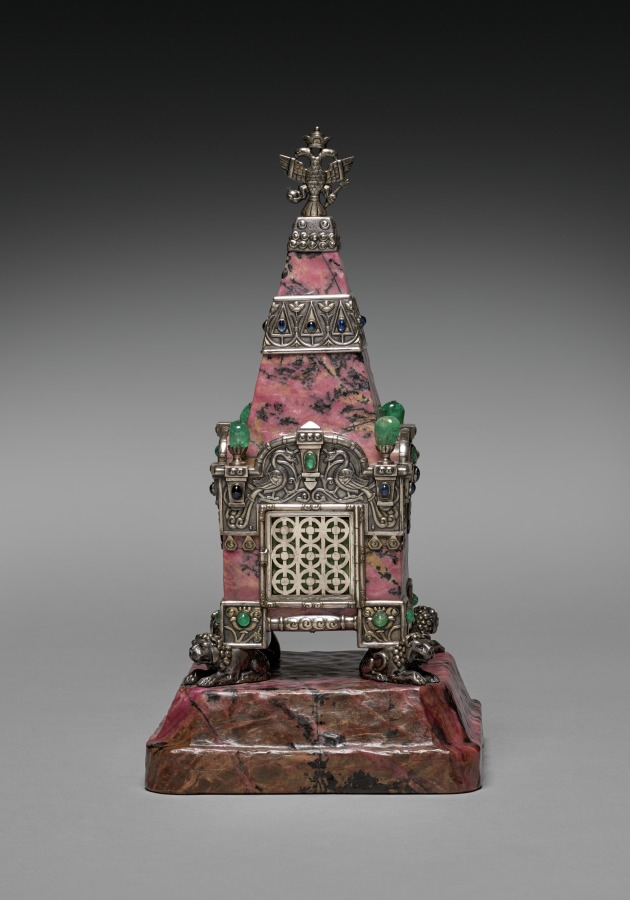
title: Kremlin Tower Clock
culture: Russia, St. Petersburg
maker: House of Fabergé (Russian, 1842–1918)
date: c. 1913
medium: rhodonite, silver, enamel, emeralds, sapphires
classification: Timepiece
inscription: 84, Kokoshnik, delta [assay mark for Moscow, 1908-26]; 91, Kokoshnik; 91; Kokoshnik; C. Fabergé (in Cyrillic); double-headed eagle [imperial warrant]; 16419 k? scratched.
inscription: Painted on clock face: Le Gruet (in script); strike, silence, set hand work (in English).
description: The use of Russian hardstones in creating precious objects became a hallmark of design from the House of Fabergé. Easily carved, these minerals were sourced largely from the western region surrounding the Ural Mountains. Fabergé's workmasters used colorful stones such as agate, nephrite (jade), lapis lazuli, rock crystal, and rhodonite, seen here in this elaborate table or mantel clock, to create all manner of luxurious accessories. Bright pink rhodonite was among the rarest, and consequently most expensive, specimens used by the House of Fabergé. This clock resembles the Taynitskaya Tower, the middle tower on the south side of the Kremlin. The House of Fabergé created this work to commemorate the 300th anniversary of the Romanov dynasty, representing Fabergé's ability to balance the functionality of objects with intricate decorative design.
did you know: The Kremlin tower, which this clock resembles, has a secret well and an underground tunnel that leads to the Moscow River.